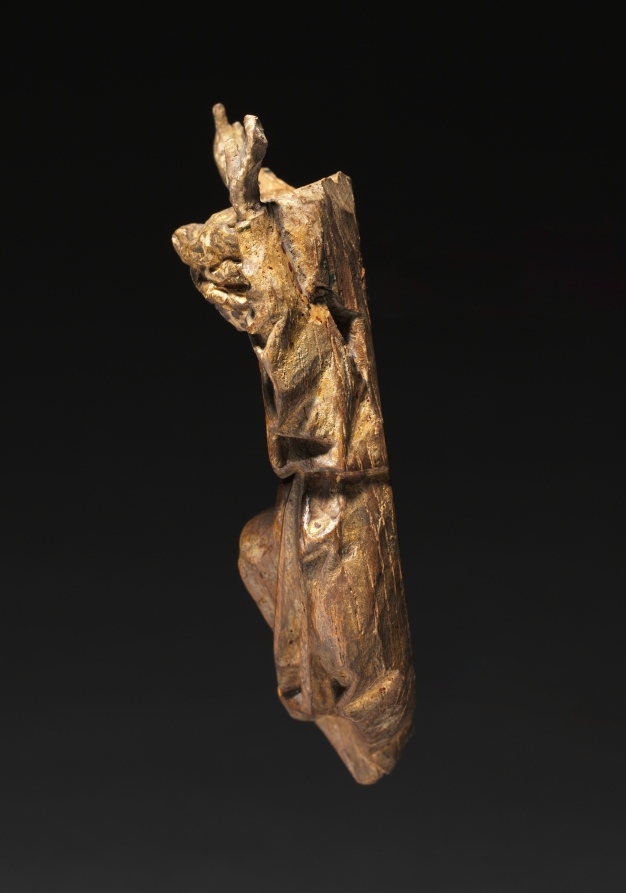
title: Angel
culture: South Netherlands, Brabant, 16th century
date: c. 1500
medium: oak with traces of gilding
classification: Sculpture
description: This lamenting angel probably comes from a Crucifixion scene at the center of a multi-figured altarpiece.